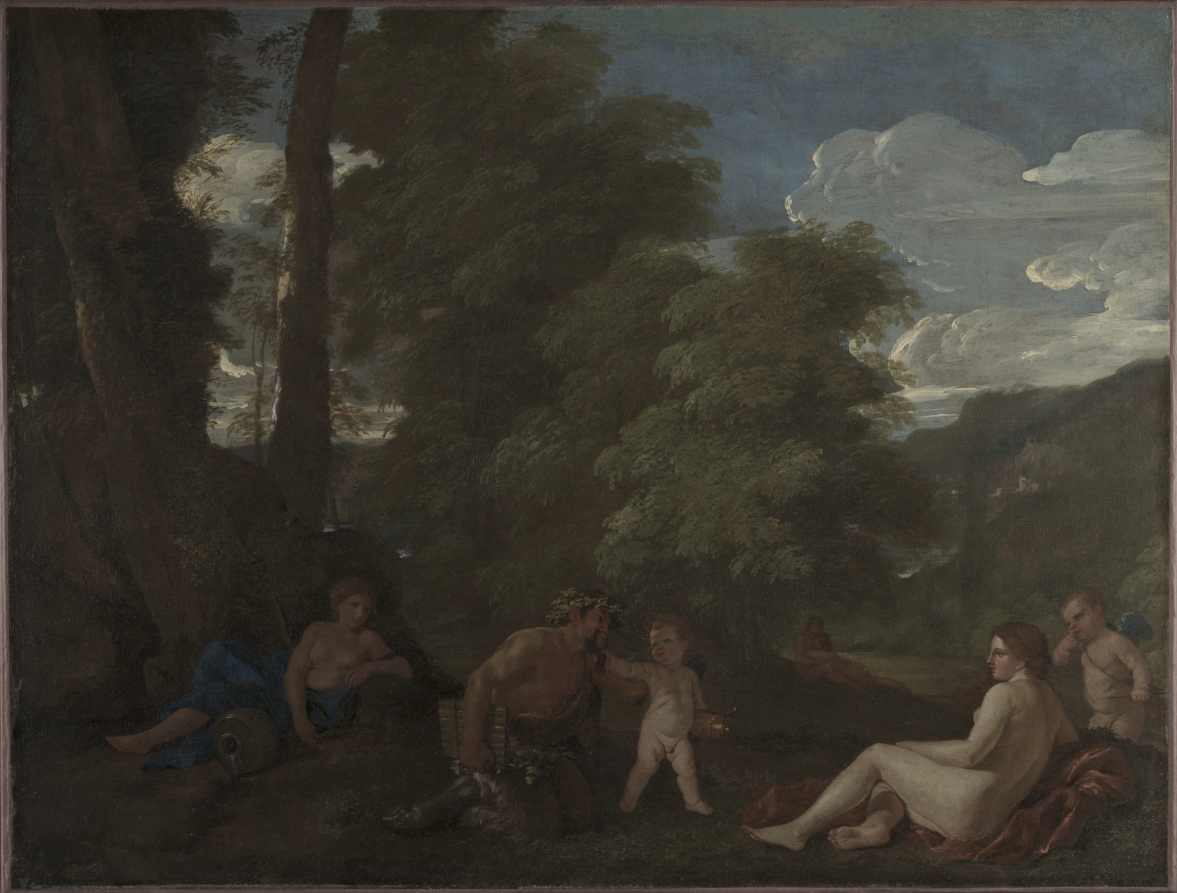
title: Nymphs and a Satyr (Amor Vincit Omnia)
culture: France, 17th century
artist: Nicolas Poussin (French, 1594–1665)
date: c. 1625–27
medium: oil on canvas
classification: Painting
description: Like his colleague Claude Lorrain, Poussin depicted historical and mythological subjects in landscapes inspired by the countryside around Rome. His themes were often complex, and frequently incorporated witty allusions to classical texts. Here, a playful cupid tugs Pan, the goatlegged Greek god of the woods, toward Venus, the goddess of love. The painting cleverly illustrates the Latin phrase amor vincit omnia, or “love conquers all” (in Greek, pan means “all”). The woodland setting represents the idyllic paradise of Pan’s home.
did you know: After arriving in Rome and experiencing financial instability, Nicolas Poussin turned to painting more popular, lucrative mythological scenes, such as those depicting nymphs and satyrs.